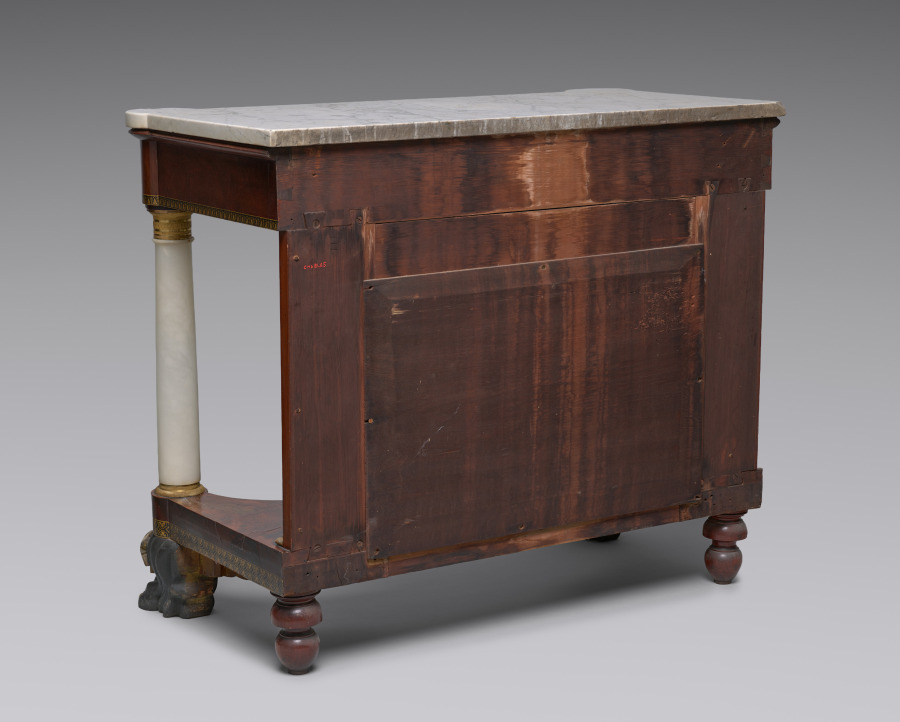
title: Pier Table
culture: America, New York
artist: Joseph Meeks and Sons (American)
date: c. 1829–35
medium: mahogany; marble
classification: Furniture and woodwork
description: Ornamental tables such as this marble-topped example were most often used in rooms on a narrow wall between two windows or just across from them on an opposite wall. Usually a gilded mirror hung above the table to create a single pier of glass, top to bottom, which reflected light around the room. This table’s bold use of carved and stenciled decoration, as well as expensive white marble, indicate that it was owned by a very wealthy family.